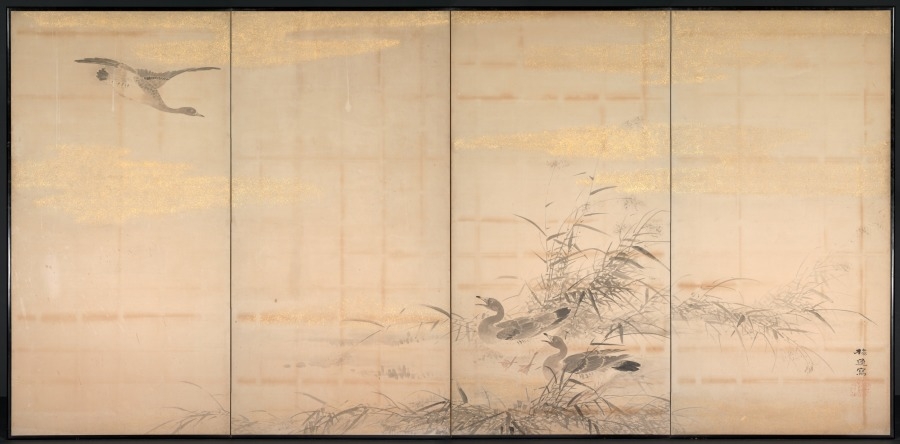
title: Geese, Reeds, and Water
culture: Japan, Edo period (1615–1868)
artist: Yamamoto Baiitsu (Japanese, 1783–1856)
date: 1800s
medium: One of a pair of four-panel folding screens; ink, color, and cut gold foil on paper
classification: Painting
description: This byōbu composition differs from most in that it comprises two four-panel screens, rather than two six-panel units. Since the current mounting is modern, it is impossible to determine whether its present configuration represents its original design. Some panels may have been removed to help the screens better fit into a modern interior space. Baiitsu worked almost exclusively in monochromatic ink tones and favored classical Chinese painting themes.